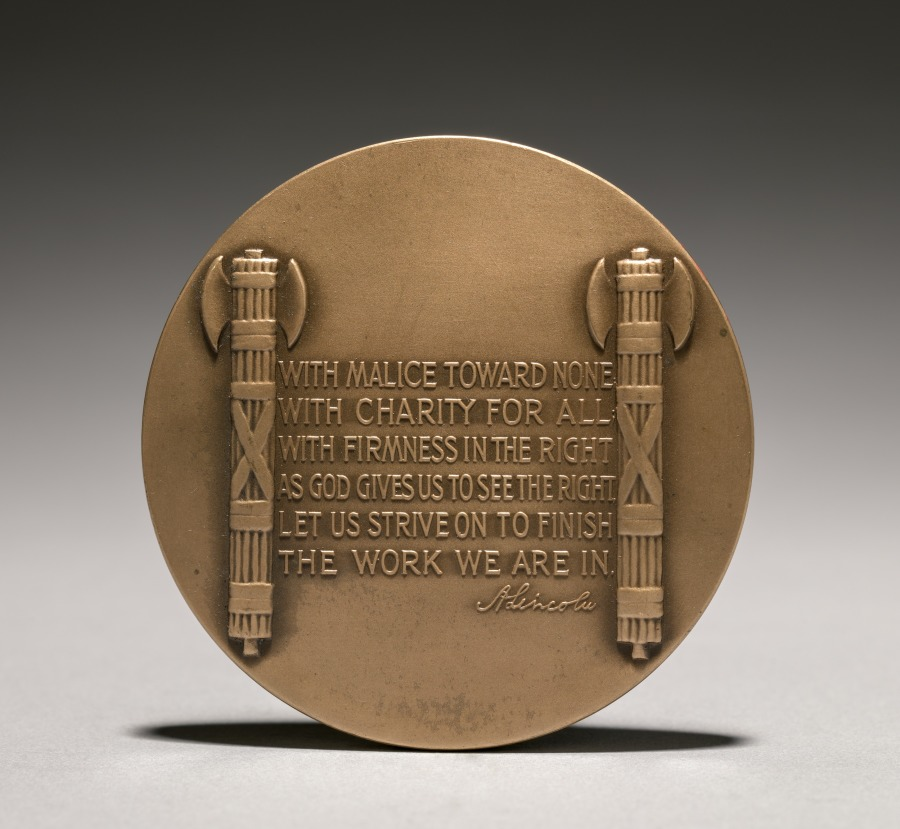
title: Abraham Lincoln Medal (reverse)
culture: America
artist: Charles Calverley (American, 1833–1914)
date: 1900s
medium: bronze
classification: Metalwork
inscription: "WITH MALICE TOWARD NONE/ WITH CHARITY FOR ALL/ WITH FIRMNESS IN THE RIGHT/ AS GOD GIVES US TO SEE THE RIGHT/ LET US STRIVE ON TO FINISH/ THE WORK WE ARE IN/ ALincoln [in ligature]."